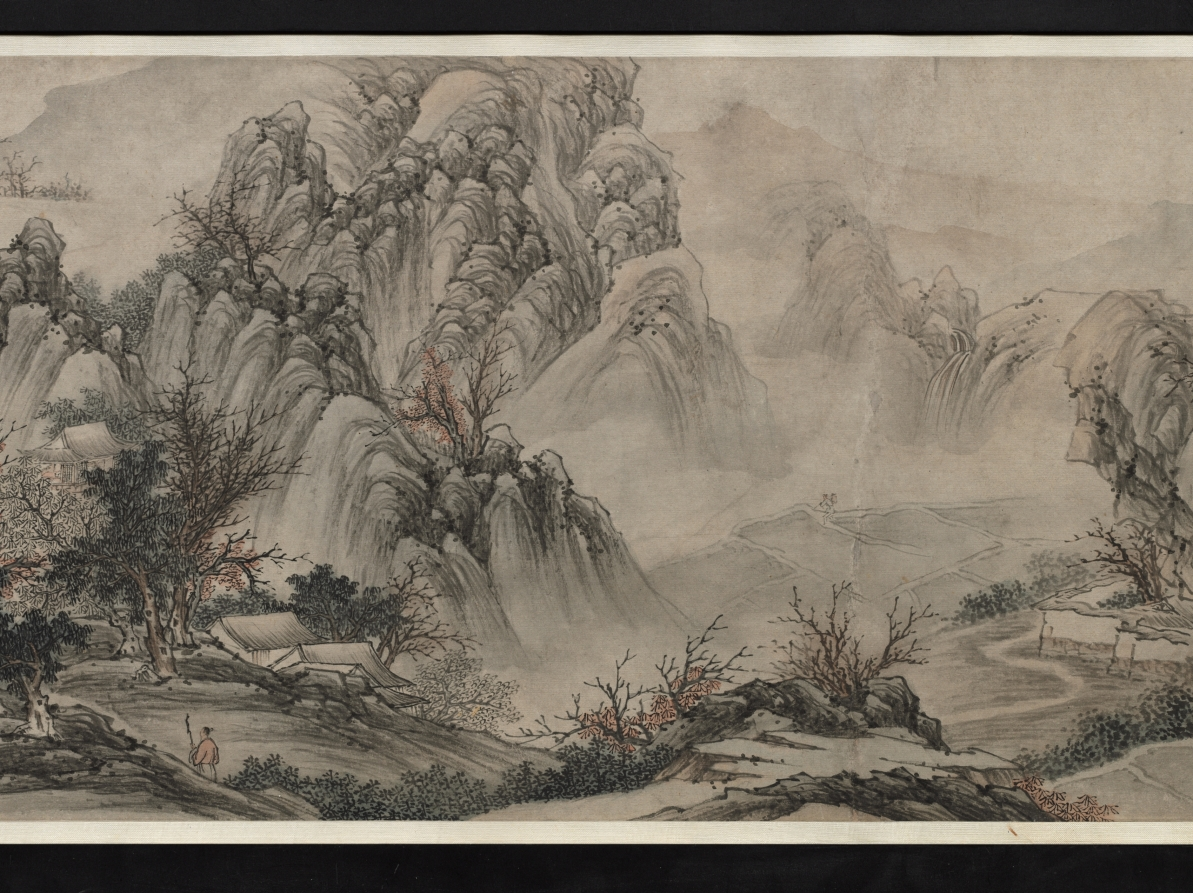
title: Autumn Mist in the Countryside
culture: China, Qing dynasty (1644-1911)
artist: Zou Zhe (Chinese, c. 1610-before 1688)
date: 1647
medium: handscroll, ink and color on paper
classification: Painting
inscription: Artist's inscription, signature, and seal: The first day of the sixth lunar month, the ting-hai year [1647], Tsou Che painted [this]. [seal] Fang-lu.